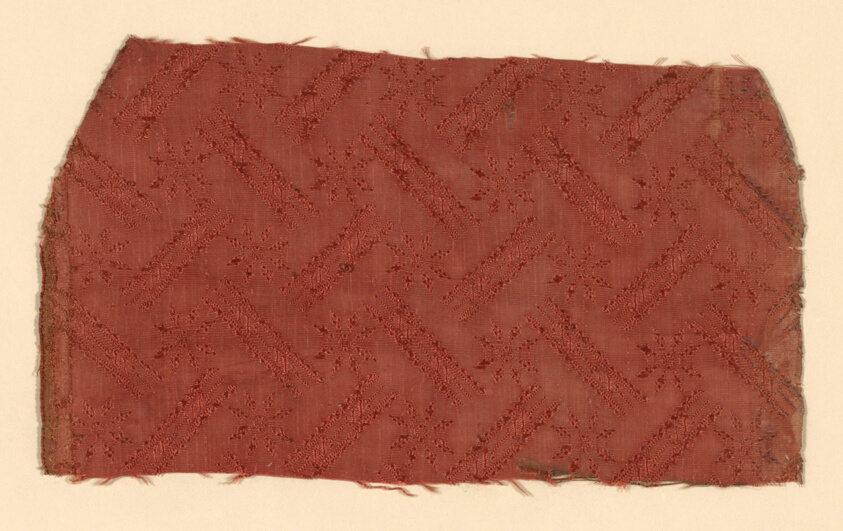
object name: Textile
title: Fragment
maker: Italy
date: 1625/75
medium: plain compound cloth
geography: Italy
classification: textile; weaving